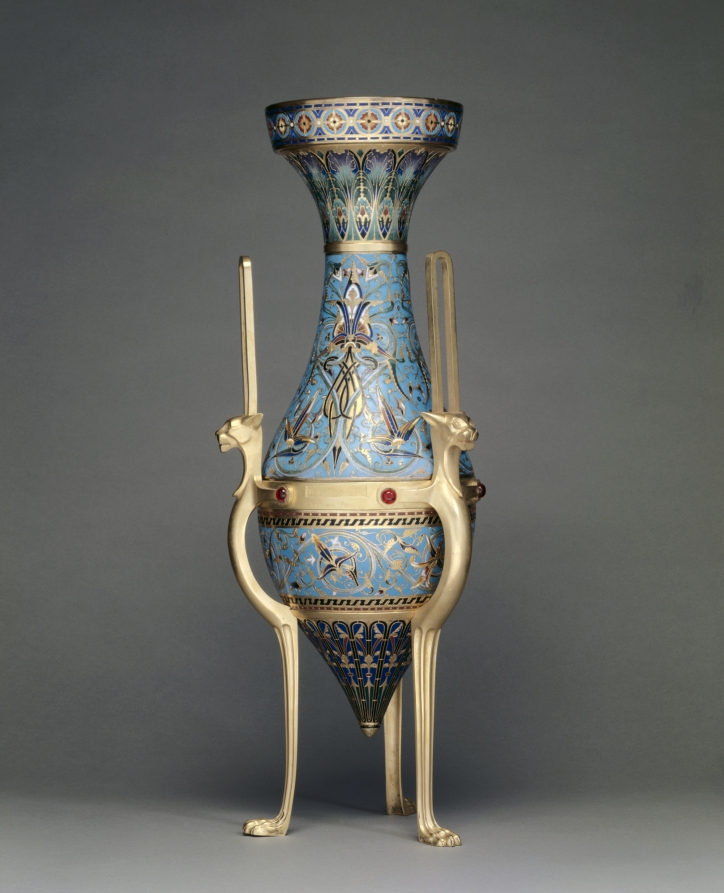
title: Vase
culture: France, 19th century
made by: Firm of Ferdinand Barbedienne (French, 1810–1892)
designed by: Louis-Constant Sévin (French, 1821–1888)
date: c. 1862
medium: gilt bronze with enamel decoration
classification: Metalwork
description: This vase vibrantly encapsulates the admiration for historical works of art and architecture that dominated the 1800s. It features stylistic qualities of ancient Egyptian, ancient Greek, and medieval Islamic art with its cat legs, amphora shape, and spiraling foliage ornamentation. The enameling technique itself, called champlevé, has roots in the ancient world. Champlevé enameling involves carving out sections of metal before filling those areas with colored enamel. The vase model was introduced at the International Exhibition of London in 1862, and its popularity resulted in several color and shape variations.